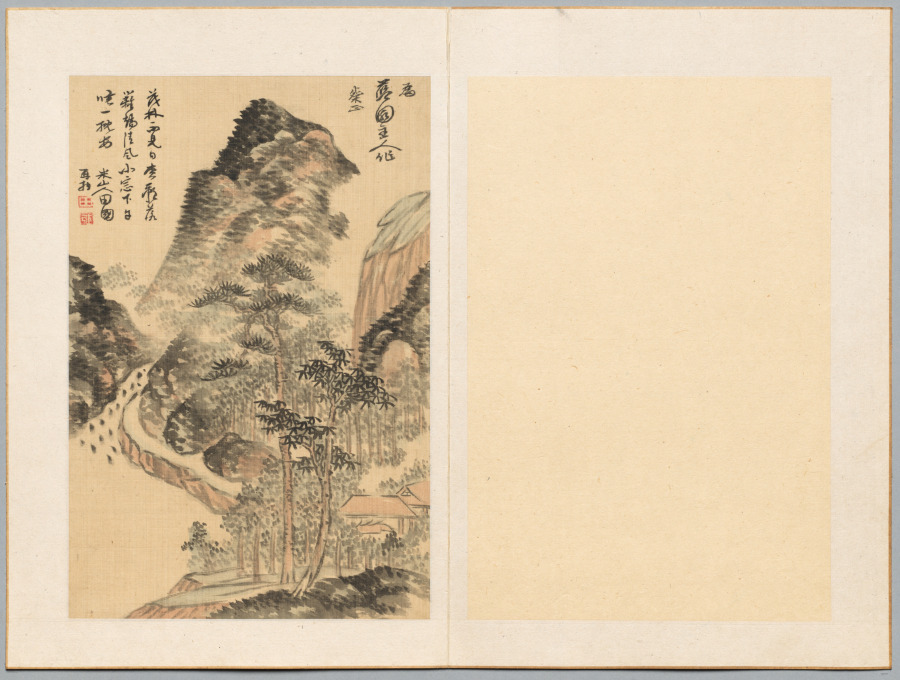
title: Short Nap on a Long Summer Day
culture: Japan, Edo period (1615–1868)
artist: Okada Beisanjin (Japanese, 1744–1820)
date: late 1700s-early 1800s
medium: leaf from a pair of folding albums; ink and light color on paper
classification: Portfolio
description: The Nanga, or "Southern School" painters of 17th- and 18th-century Japan were greatly influenced by Chinese culture. The subjects and styles of their work reflected the contemporary Japanese taste for imported Chinese objects and learning. A common practice among Nanga painters was the exchange of small paintings and calligraphies. They also celebrated special gatherings of artist-friends by producing individual sheets that were then gathered together in albums. The sheets shown here were part of such a gathering.